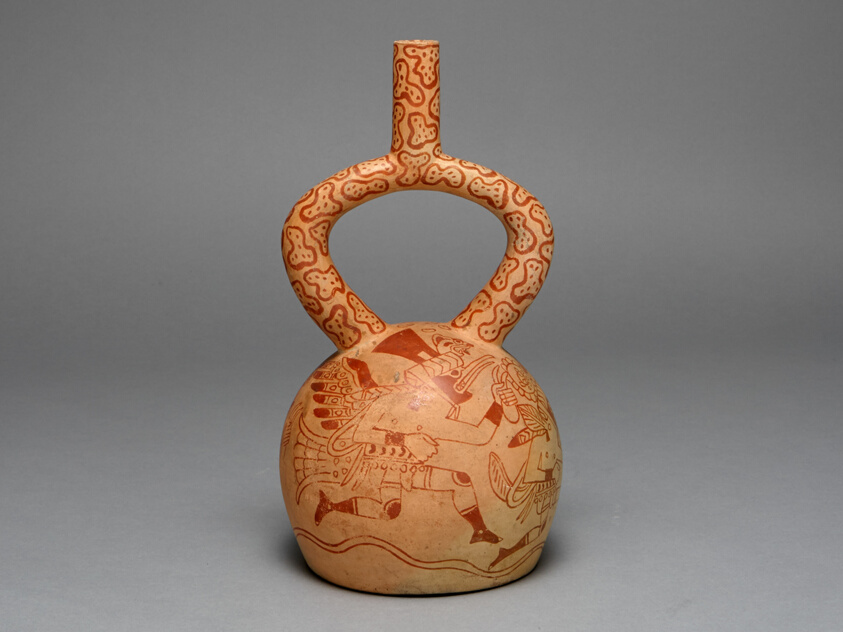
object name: Vessel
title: Stirrup Spout Vessel Depicting Costumed Runners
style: moche, mochica, early intermediate period, Pre-Columbian, americas, Arts of the Americas, andean, andes, south american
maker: Moche (North coast, Peru)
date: 100 BCE–500 CE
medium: Ceramic and pigment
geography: Moche Valley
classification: earthenware; art of the americas; ceramics; vessel